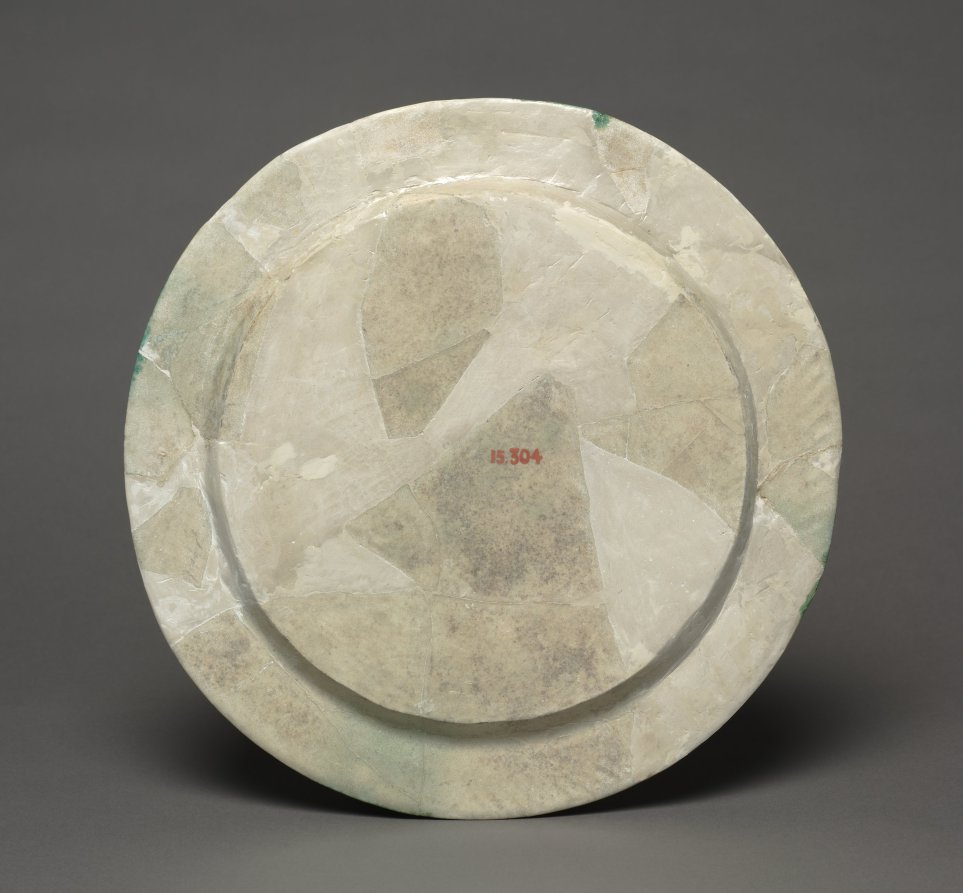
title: Dish with Splashes of Green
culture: Iraq, Basra, Abbasid period (750–1258)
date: 830–900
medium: Earthenware with overglaze design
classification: Ceramic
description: This dish displays two great technological advances of the 800s: the invention of opaque white glaze made with tin (imitating Chinese porcelain) and painting in cobalt blue. The blue paint was sometimes used to decorate the center of the bowl with floral and geometric designs, as seen here, or to write Arabic inscriptions offering blessings and well wishes. The green splashes around the rim reflect a popular color choice at the time. The splash effect was made by placing green glaze at the edge of the rim and then allowing it to run toward the center of the dish.